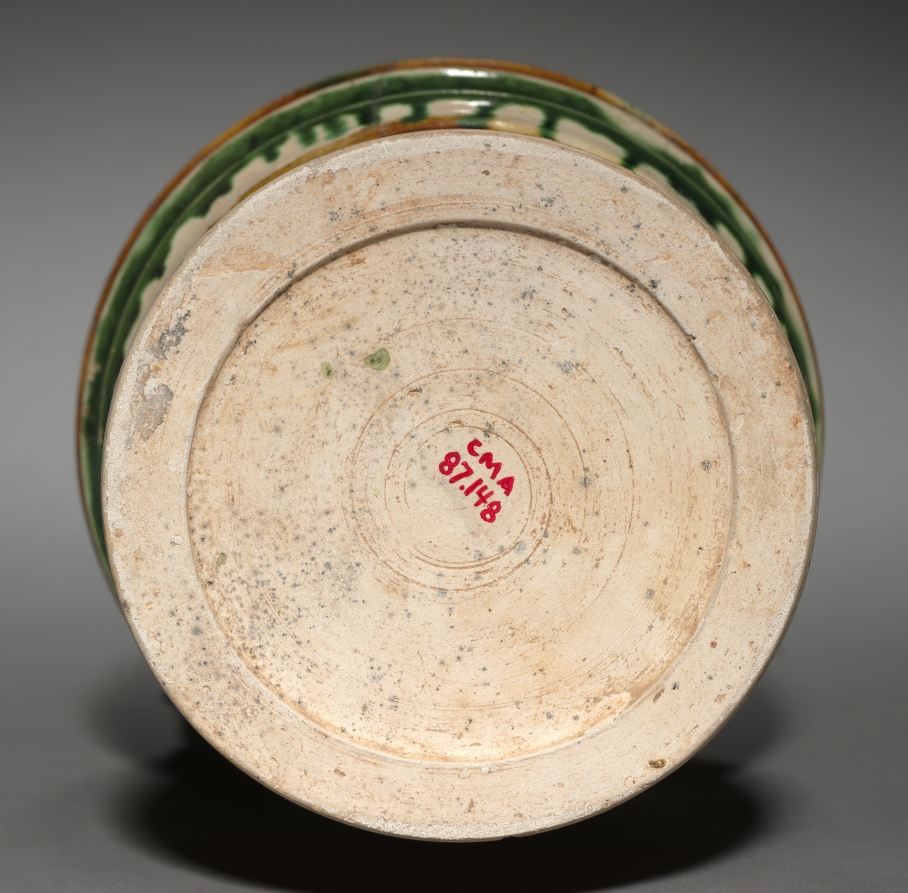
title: Ewer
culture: China, Tang dynasty (618-907)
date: 700–750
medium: glazed earthenware, sancai (three-color ware)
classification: Ceramic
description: Many sancai or "three-color" lead-glazed wares-such as this ewerare notable for their heavy dependence on metalwork prototypes. Such polychrome glazed wares were intended for the tomb.